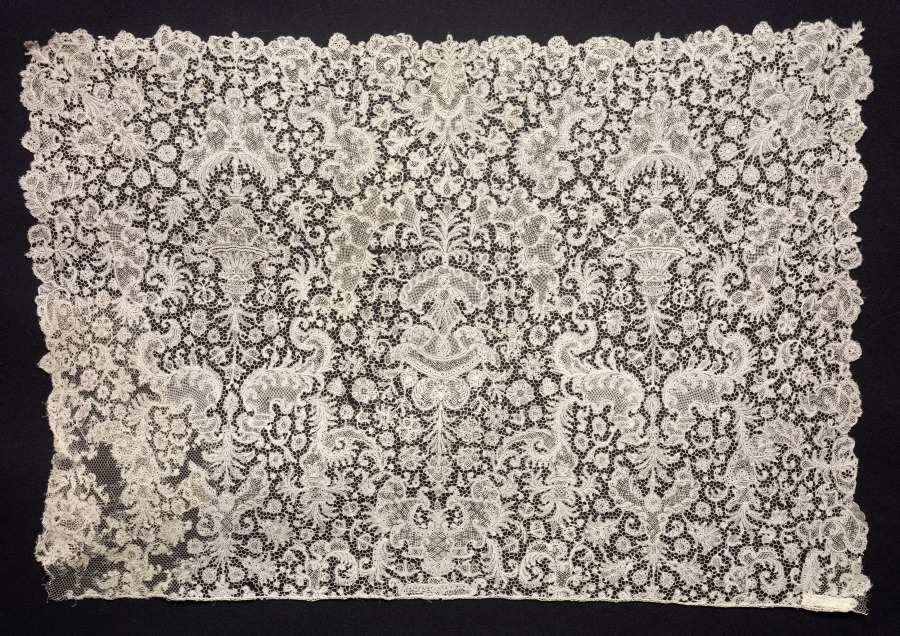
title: Lace Jabot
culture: Flanders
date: 1600s-1700s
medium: Bobbin lace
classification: Lace